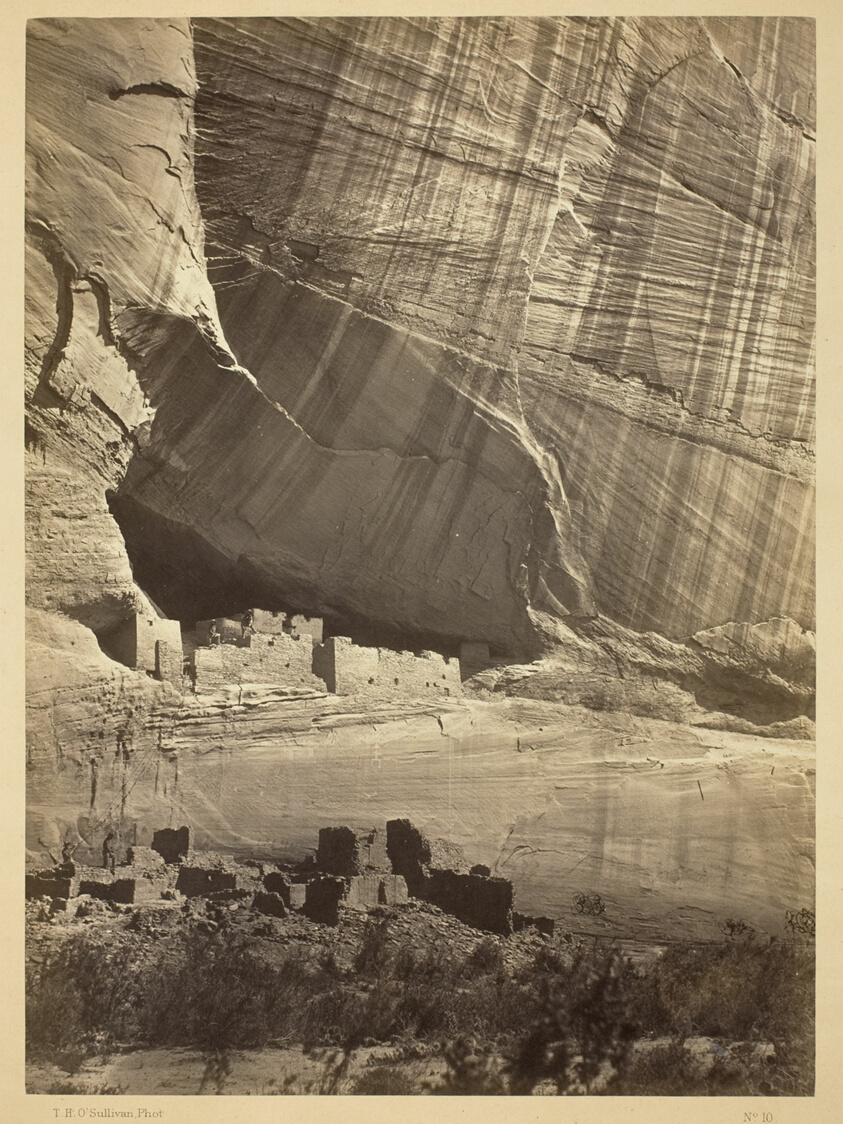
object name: Photograph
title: Ancient Ruins in the Cañon de Chelle, N.M. In a niche 50 feet above present Cañon bed.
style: 19th century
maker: Timothy O'Sullivan (American, born Ireland, 1840–1882)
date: 1873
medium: Albumen print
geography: United States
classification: albumen silver print; photographic process; photography; photograph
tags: Collected by Hugh Edwards